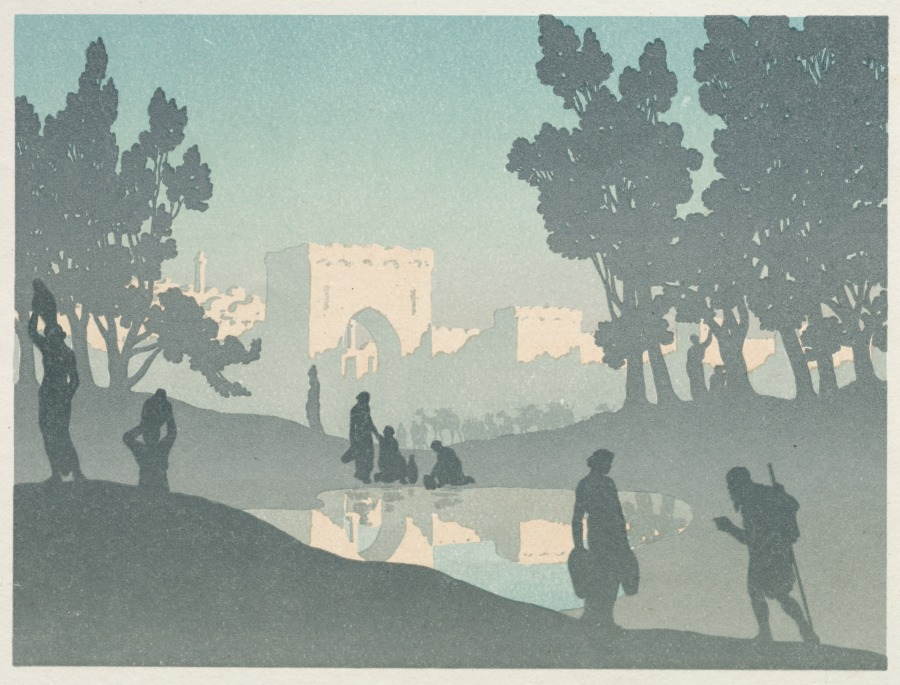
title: The Wandering Jew: The Old City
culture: France, 19th century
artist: Henri Rivière (French, 1864–1951)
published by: Verneau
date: 1896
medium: color lithograph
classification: Portfolio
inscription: title page is signed, in blue crayon: Henri Rivière